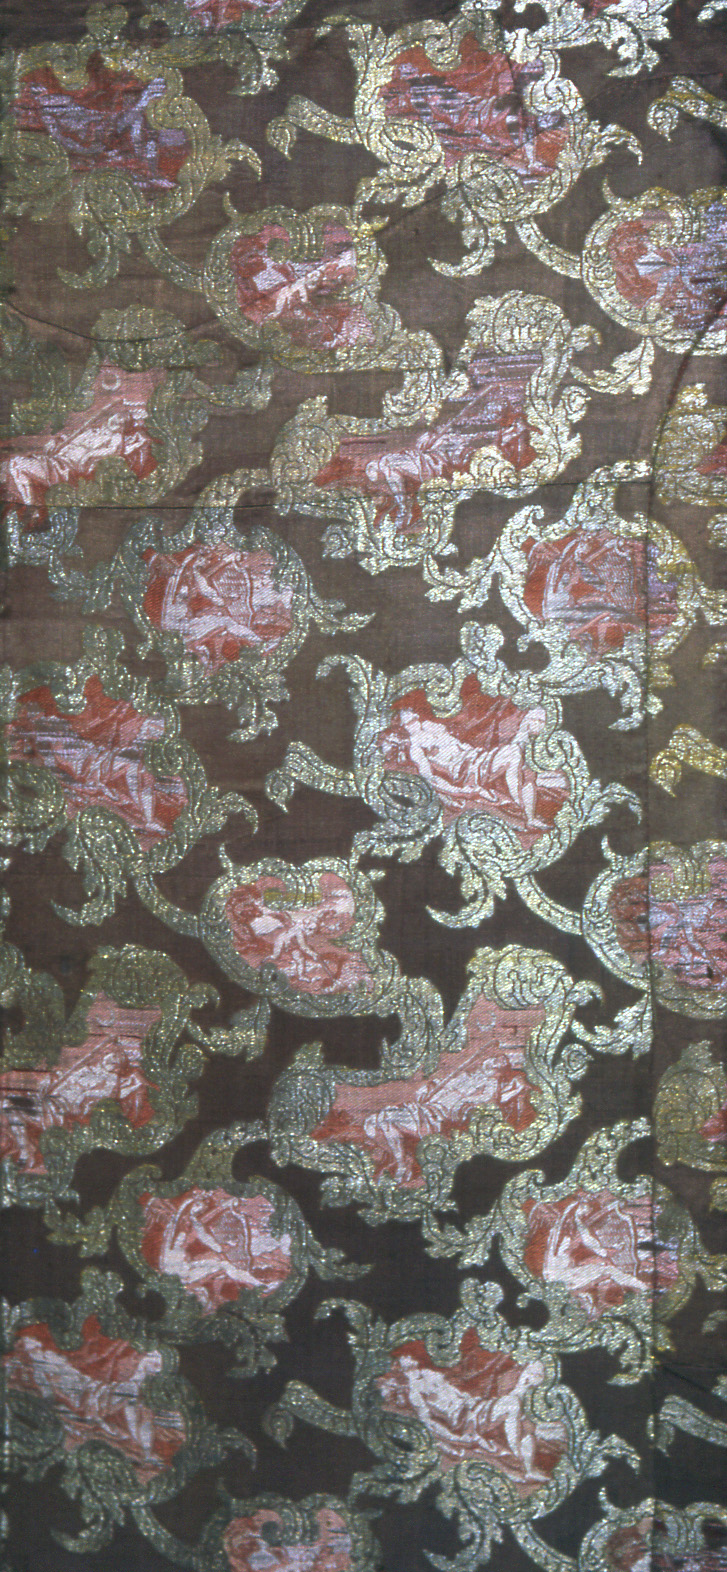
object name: Textile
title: Panel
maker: France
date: 18th/mid–19th century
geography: France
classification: textile; weaving